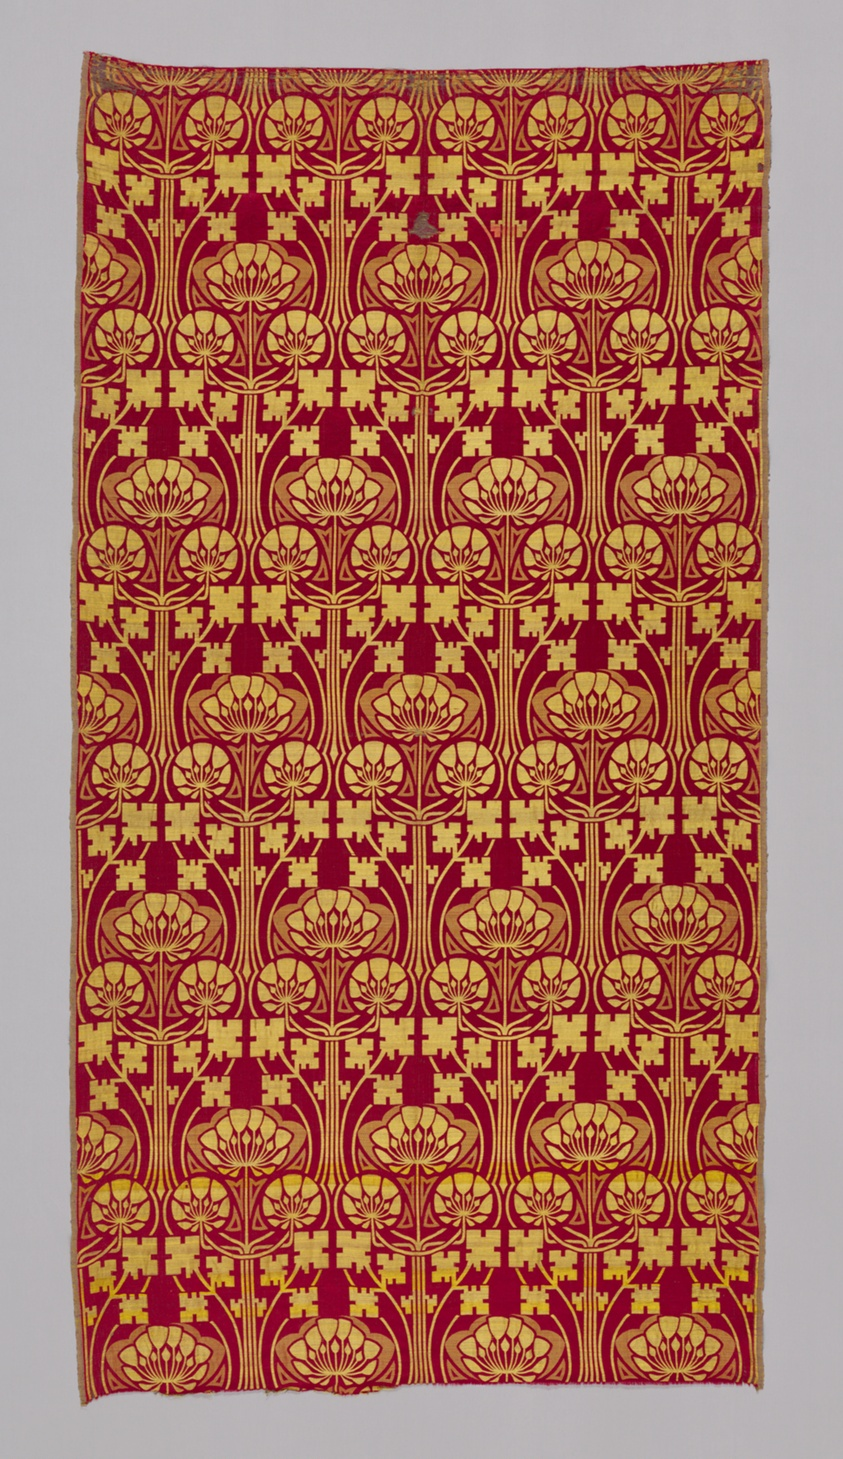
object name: Textile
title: Panel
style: Art Nouveau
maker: Designed by René Beauclair (French, active c. 1910); France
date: c. 1900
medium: Silk, wild silk, and linen, satin weave with patterning wefts bound in twill interlacings; woven on loom with Jacquard attachment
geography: France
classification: textile; weaving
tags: flowers